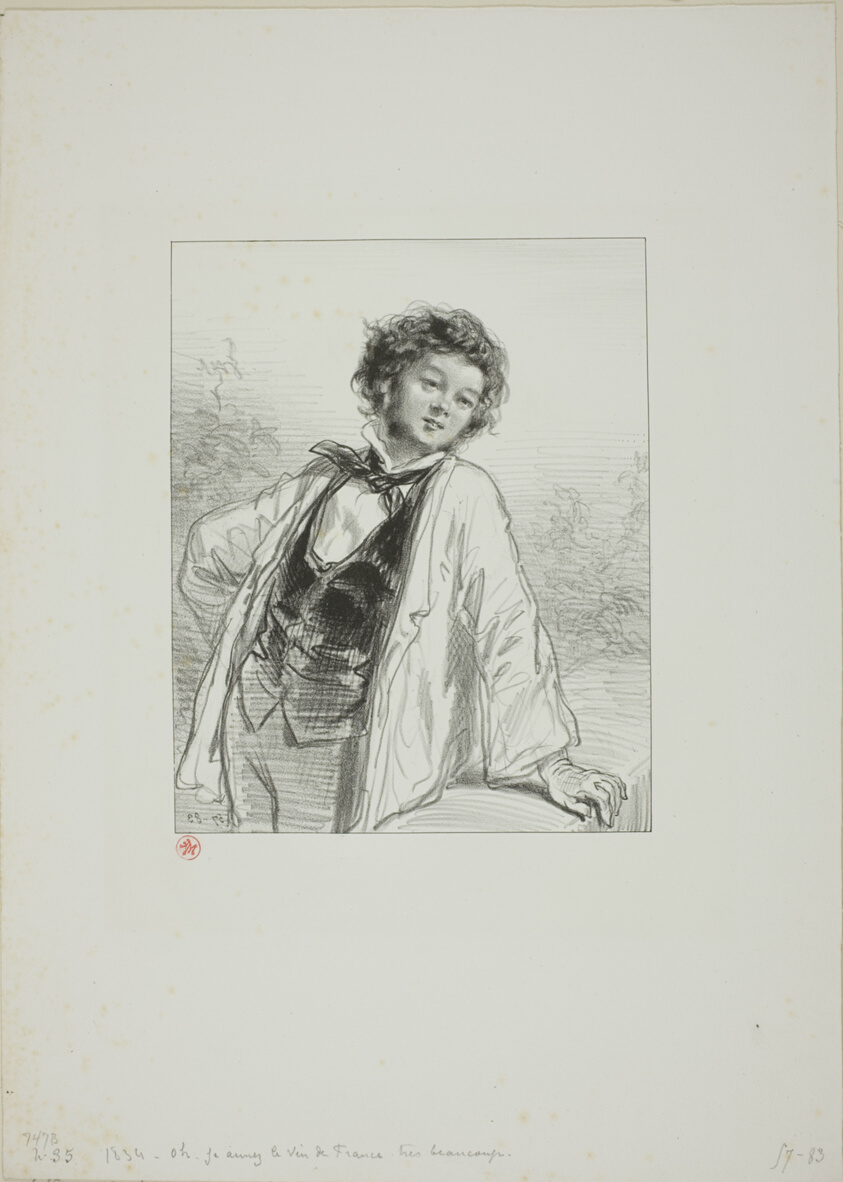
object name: Print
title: Masks and faces: Oh, je aimez le vin de France trais bocoap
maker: Paul Gavarni (French, 1804-1866)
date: 1857–58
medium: Lithograph in black on ivory wove paper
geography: France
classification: lithograph; print; prints and drawing